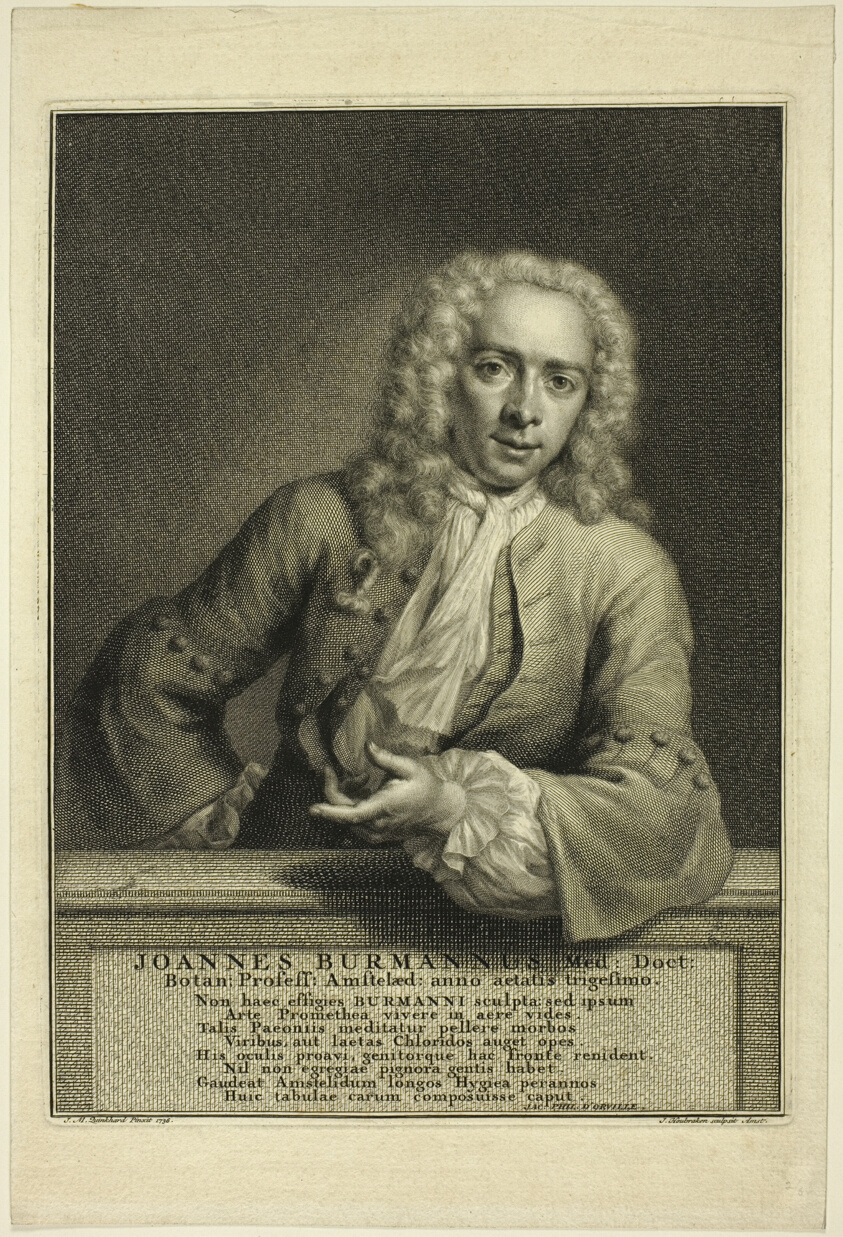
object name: Print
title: J. Burmannus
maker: Jacobus Houbraken (Dutch, 1698-1780)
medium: Engraving on paper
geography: Holland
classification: engraving; print; prints and drawing